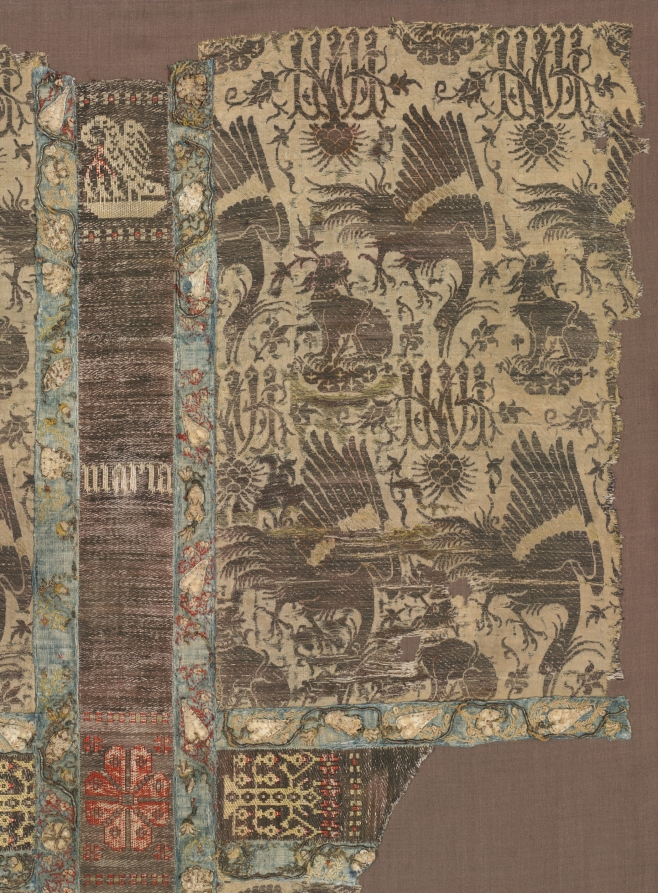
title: Fragmentary Chasuble with Woven Orphrey Band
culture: Italy (Chasuble) and Germany (Orphrey)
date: 1300s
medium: Silk and gold thread, lampas weave; embroidered orphrey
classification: Textile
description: The second half of the 1300s was one of the great periods of Italian silk design. Drawing upon Chinese, Islamic, and European motifs, artists created international designs. This rare, fragmentary chasuble displays a Chinese phoenix with outstretched wings flying toward a group of pseudo-Kufic, Arabic-like letters while a dog snarls at the bird. Arabic script was associated with the Holy Land. Italian textiles were an important export product at the end of the Middle Ages. In this case, the fabric was shipped to Germany, where it was used to create a chasuble, the upper garment of the bishop and priest during Holy Mass.